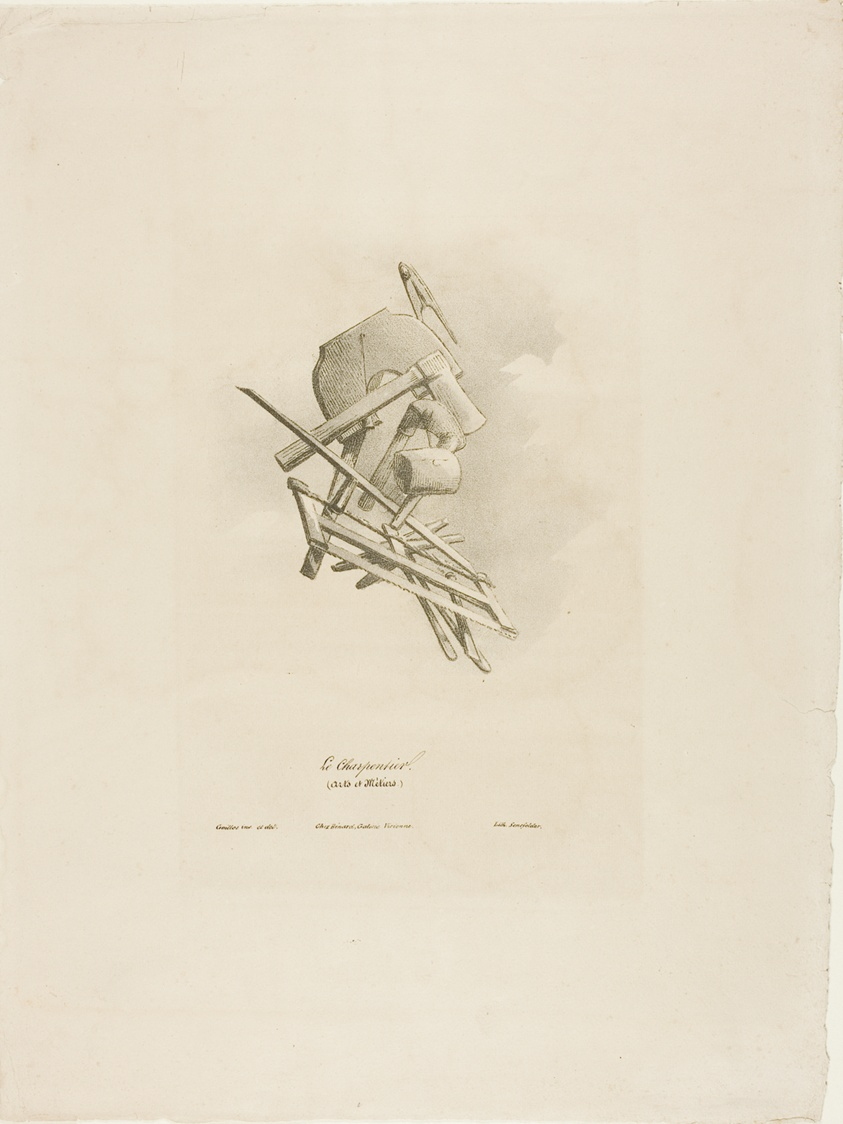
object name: Print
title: The Carpenter, from Arts et Métiers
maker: Bernard Gaillot (French, 1780-1847); printed by Alois Senefelder (German, 1771-1834)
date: 1838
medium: Lithograph in black on buff wove paper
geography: France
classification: lithograph; print; prints and drawing